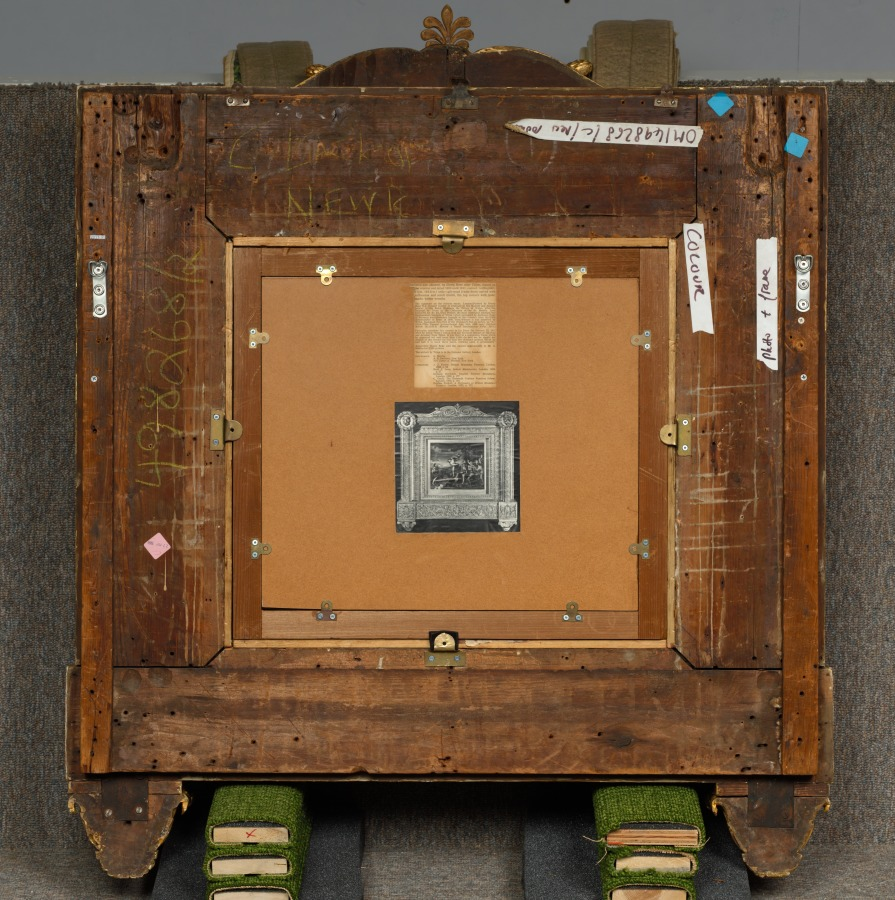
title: Bacchus and Ariadne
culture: England, 19th century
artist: Henry Bone (British, 1755–1834)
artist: after Titian (Italian, c. 1488–1576)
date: 1808–11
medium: enamel, in original gilt-wood and gesso carved frame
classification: Miniature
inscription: Signed and dated H Bone, 1811 on the recto (on the urn, lower left), inscribed on frame mat at bottom right: ENAMEL HBONE, and signed, dated and inscribed in full on the counter-enamel "painted by Henry Bone R.A. Enamel painter in Ordinary to His Majesty and Enamel painter to His Royal Highness the Prince of Wales, after the Original by Titian in the Collection of the Rt: Honble: Lord Kinnaird &c &c &c.____ This Picture the most celebrated amongst the Bacchanalian Subjects of Titian (when patronis'd by Alphonso Duke of Ferrara) was ultimately brought to this Country from the Villa Aldobrandini in Rome in 1806, from whence it was imported by Willm. Buchanan Esq.____ Size of the Original 6 feet 2 inches, by 5 ---- 10 ---- This Enamel picture w[as] began July 30th 1808 and finish'd March 1811. ___ (HB. Elected a Royal Academician Feby. 11th 1811)"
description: Henry Bone devoted three years to creating this work, a tremendous technical achievement and the largest enamel on copper that had ever been made. The painstaking process required each application of color to be fired at a different temperature in the kiln. The enamel exactly reproduces Titian’s Bacchus and Ariadne (now in the National Gallery, London), an early sixteenth-century Italian masterpiece that had recently come into an English collection. The elaborate carved and gilded wood frame was specially designed for the work, an indication of the cultural value placed on great enamel reproductions of famous paintings. Bone was unable to show his masterwork at the annual Royal Academy exhibition in 1811 because the Prince of Wales had asked to see it. When the prince decided not to purchase it, Bone issued more than 4,000 tickets for visitors to view the work in his studio.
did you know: Henry Bone was known for his enamel paintings created through a laborious process of fusing painted glass to copper and firing at controlled temperatures.